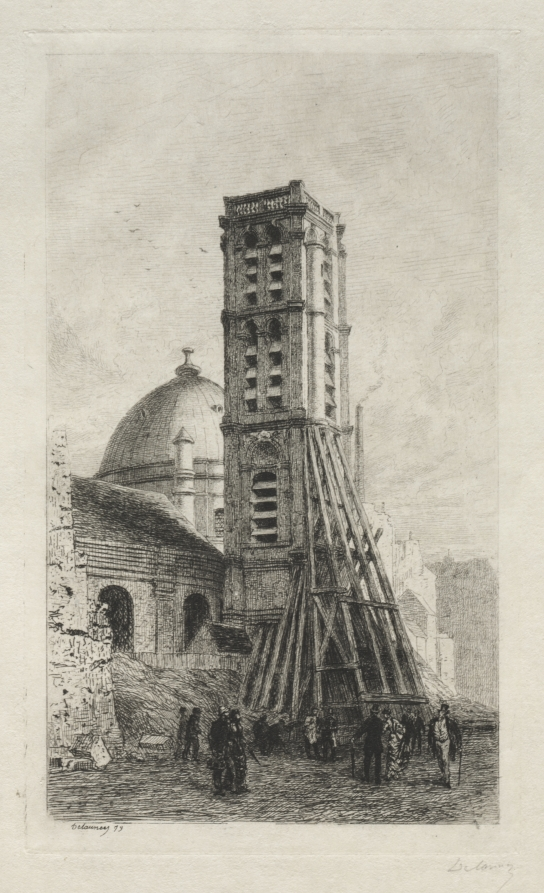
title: L'Eglise Saint-Roch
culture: France, 19th century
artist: Alfred Alexandre Delauney (French, 1830–1894)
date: c. 1870–94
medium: etching and drypoint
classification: Print